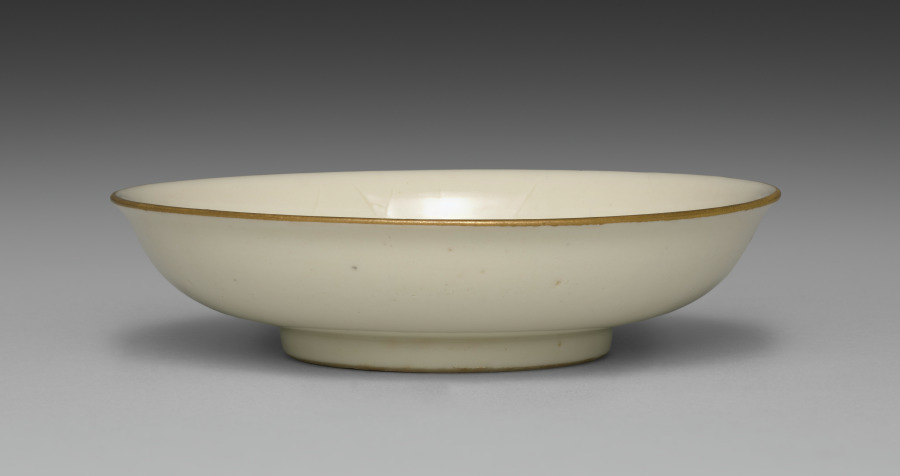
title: Small Dish from Dining Set with Plum Blossoms and Cracked-Ice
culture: Japan, Meiji period (1868–1912)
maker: Seifū Yohei II (Japanese, 1844–1878)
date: c. 1875–78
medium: Porcelain with molded designs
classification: Ceramic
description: Each item in this set has a delicate low-relief design of flowering plum branches over scattered, intersecting lines meant to resemble the cracked-ice surface of a frozen body of water and is signed on the base in gold pigment. While Yohei II produced many fine works in underglaze blue, like those produced by Kiyomizu Shichibei, he also made works in quite different styles later in his career, from the early 1870 s. In 1873, he was appointed purveyor to the Industrial Center of Kyoto Prefecture, a designation associated with Kyoto’s efforts to reach an international market through the port of Kobe; and from 1875 until his death, he was involved in national-level projects to present Japanese ceramics across the world. It was during this period that Yohei III was apprenticed to Yohei II, and it has been suggested that this set may in fact be an early example of Yohei III’s work, which he signed with his teacher’s name. Decorated with flowers resembling Japanese textile motifs, the set calls to mind the design of Yohei II’s pair of vases with plum blossoms in the Victoria and Albert Museum. Here, the elaborate trees created for a formal public exhibition setting have been translated into the approachable blossoms of the genteel domestic environment. While the designs are consistent across the pieces, each raised flower petal and pistil and each incised line in the ice was done by hand, so the cups, bowls, and dishes are similar yet unique. The bottoms of two boxes once identified the set’s owner, but the information has been deliberately obscured with black ink. However, inscriptions still visible appear to indicate two occasions, once at the end of July 1886 , and once again in June 1916 , when parts of the set were requested from Hokura in Niigata Prefecture. The location corresponds to a neighborhood in the present-day city of Jōetsu. The surname Tsuji 辻 also appears on a paper tag affixed to one of the box cloths. Future research may possibly reveal more about their provenance. A vase by Yohei III in a private collection combines the formal grandeur of the Yohei II vases in the Victoria and Albert Museum with the gentler design of this dining set, placing flowering plum trees against soft, scalloped-edge clouds resembling those in golden screens.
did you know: The dining wares have a creamy white coloration that the four boxes containing them identify as Korean in style.